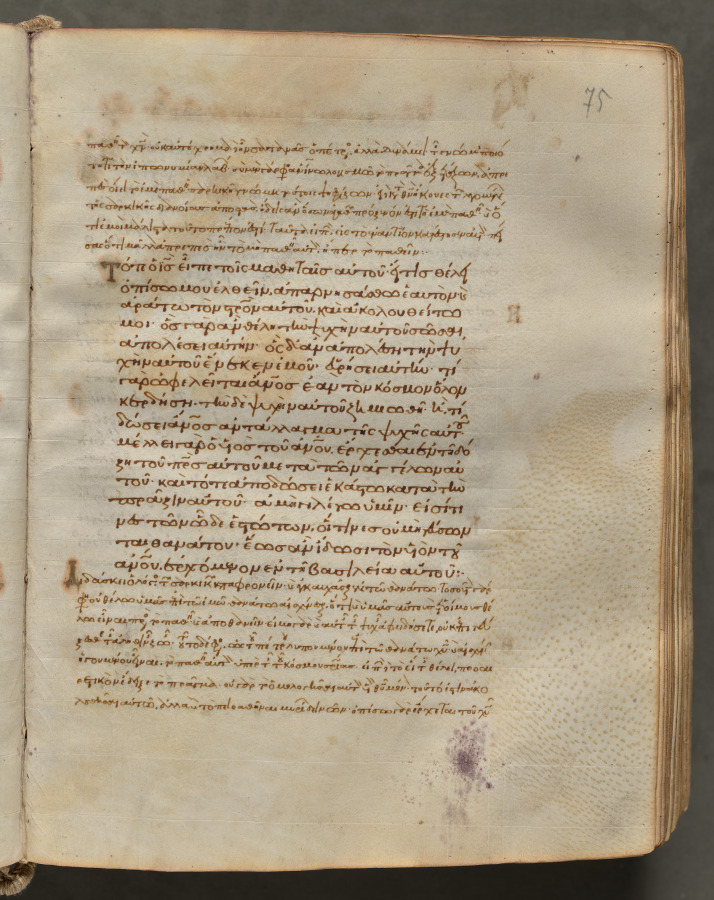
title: Text, folio 75 (recto), from a Gospel Book with Commentaries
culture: Byzantium, Constantinople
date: c. 1000–1100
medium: ink, tempera, and gold on vellum; leather binding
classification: Bound Volume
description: Each of the four gospels in this book opens on a page with brilliantly illuminated borders depicting the author of the text as well as birds-principally peacocks, symbols of the immortality of the soul-and fountains, representing the fountain of life and the salvation of the soul. This volume consists of 428 leaves with texts in Greek. Its level of sophistication suggests that it was probably written and decorated in a monastery in Constantinople.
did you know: Gospel Books were carried in procession through Byzantine churches.